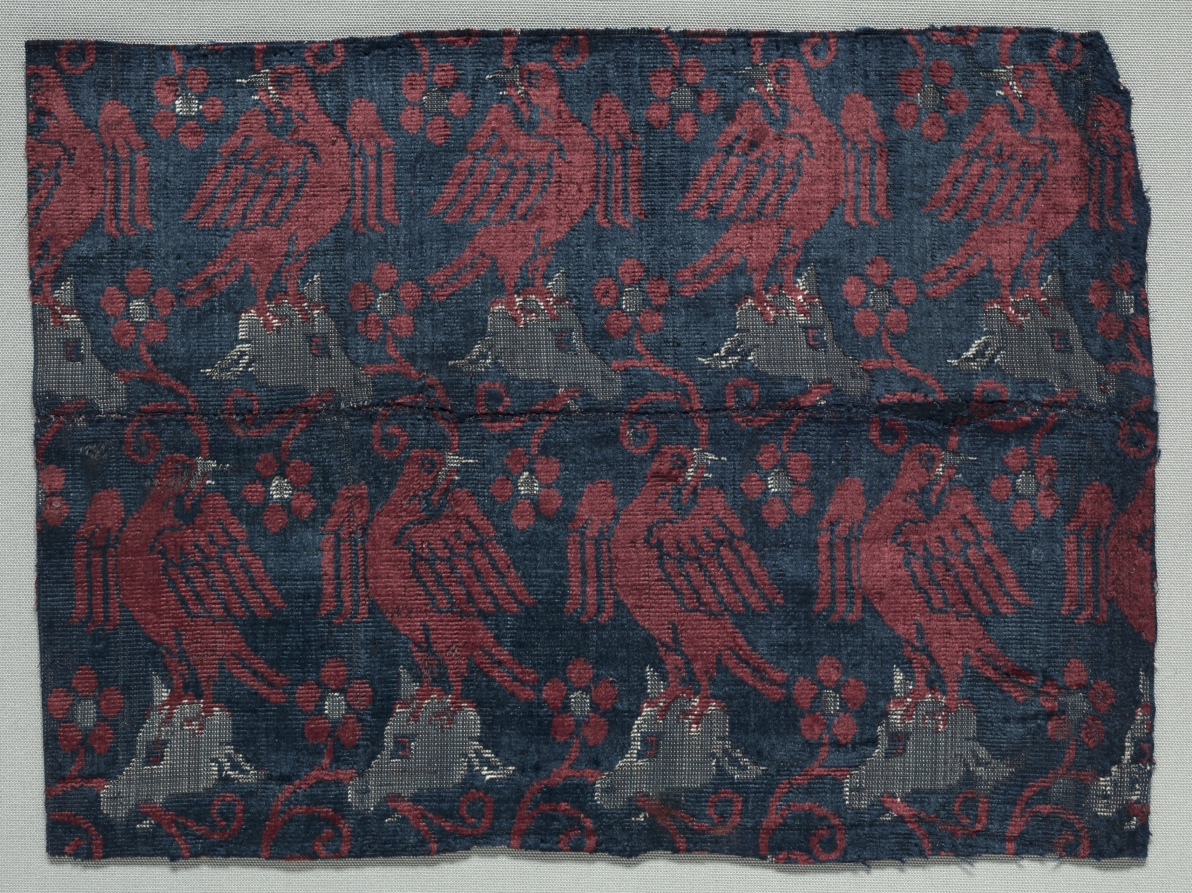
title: Velvet Fragment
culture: Italy, last quarter of 14th century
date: 1375–1399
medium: velvet; silk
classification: Velvet